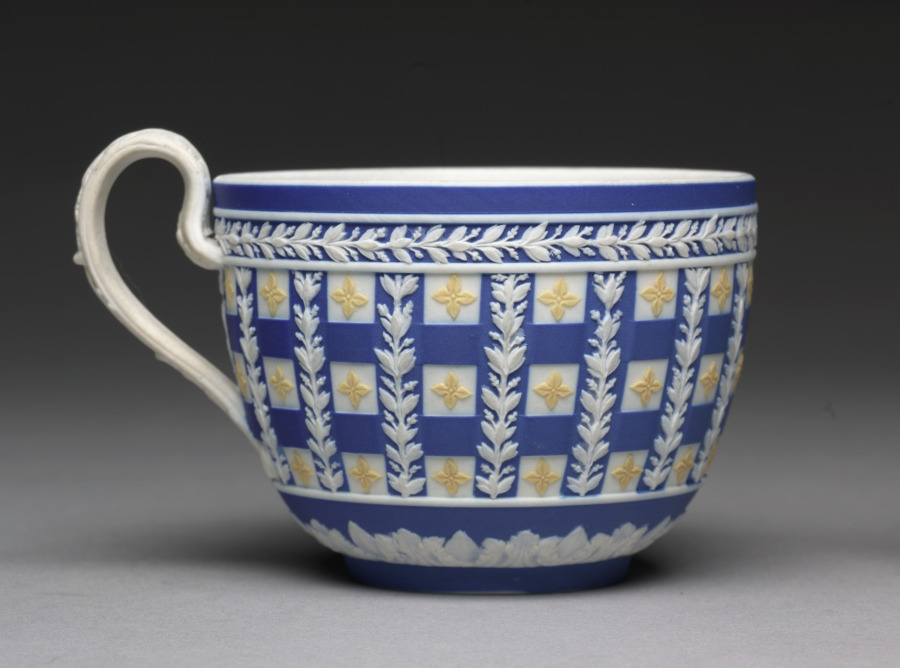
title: Cup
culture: England, Staffordshire, 18th century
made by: Wedgwood Factory (British)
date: c. 1784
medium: jasper ware with relief decoration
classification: Ceramic